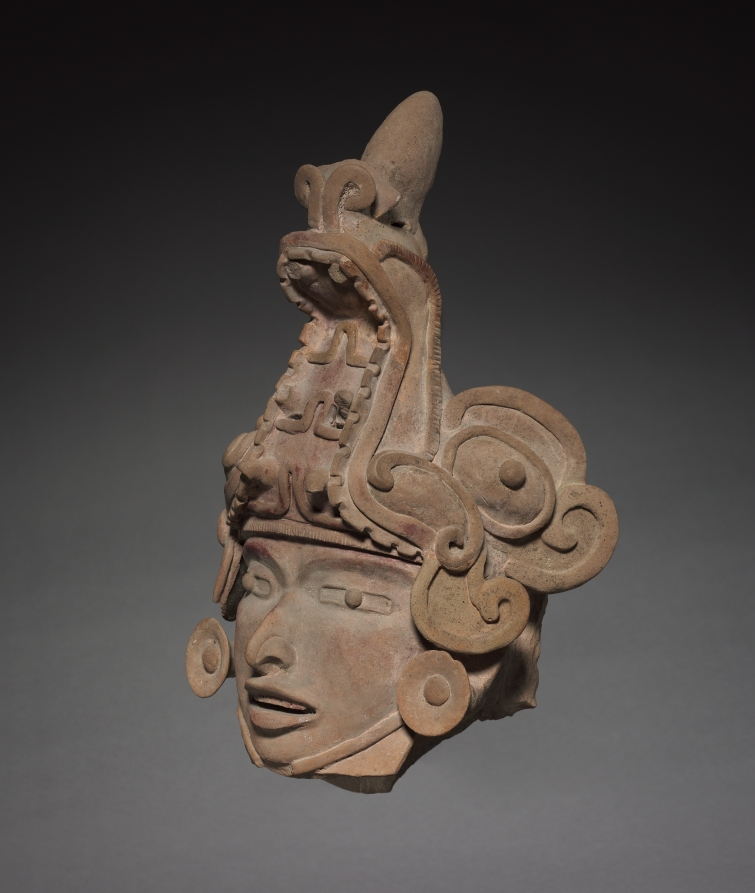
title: Head with Animal Helmet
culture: Mexico, Gulf Coast, San Andrés Tuxtla(?)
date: c. 600–1000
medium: earthenware, pigment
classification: Sculpture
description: The Gulf Coast of Mexico was an important center of ceramic sculpture production for more than 2,000 years. Nearly life-size hollow effigies, produced after about AD 600, are among the most spectacular works from this region. Although the faces were sometimes made with molds, this example appears to be hand-modeled. The mythical serpent helmet indicates that the figure may be a ritual performer.